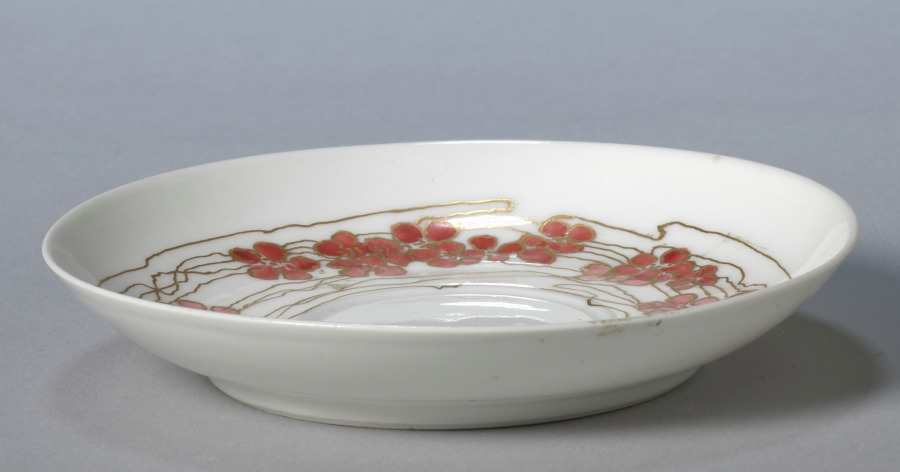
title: Saucer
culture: America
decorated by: M. Louise McLaughlin (American, 1847–1939)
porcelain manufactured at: Haviland & Co. (French)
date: 1890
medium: porcelain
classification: Ceramic